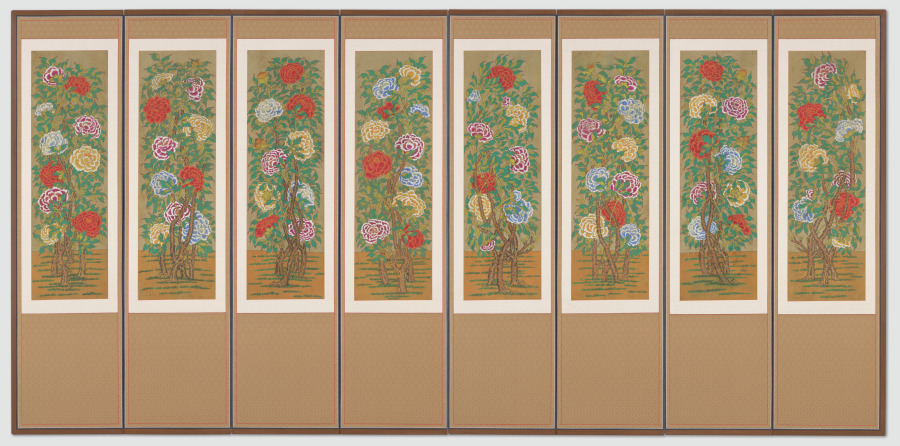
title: Peonies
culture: Korea, Joseon dynasty (1392−1910) or Japanese colonial period (1910−1945)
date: early 1900s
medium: Eight-panel folding screen; ink and color on silk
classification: Painting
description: By the late nineteenth century, peony paintings with bold designs and striking graphic stylization were increasingly produced and consumed by middle-class members because of its symbolic meaning: prosperity and wealth. This early 20th-century folding screen of peonies may have used for festive occasions such as weddings.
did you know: This early 20th-century folding screen has both sides painted with the image of bloomed peonies.